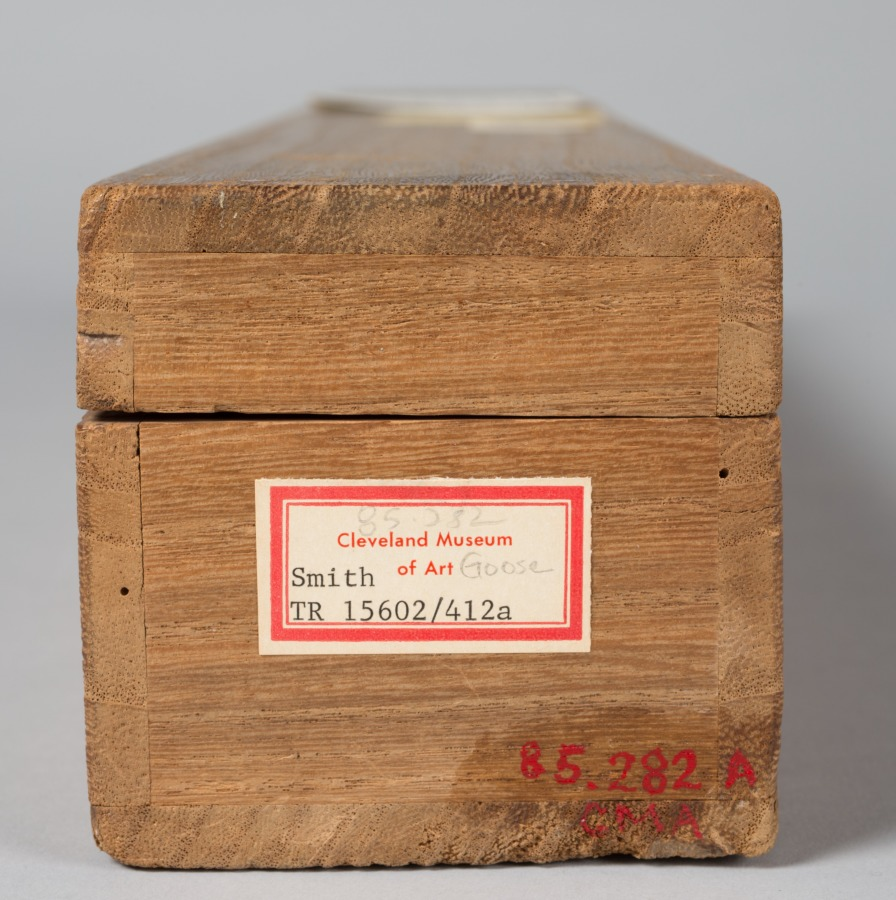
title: Goose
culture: Japan, Edo period (1615–1868)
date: c. 1615–99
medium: hanging scroll; ink on paper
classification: Painting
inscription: spurious seal of Sesshu, lower right.